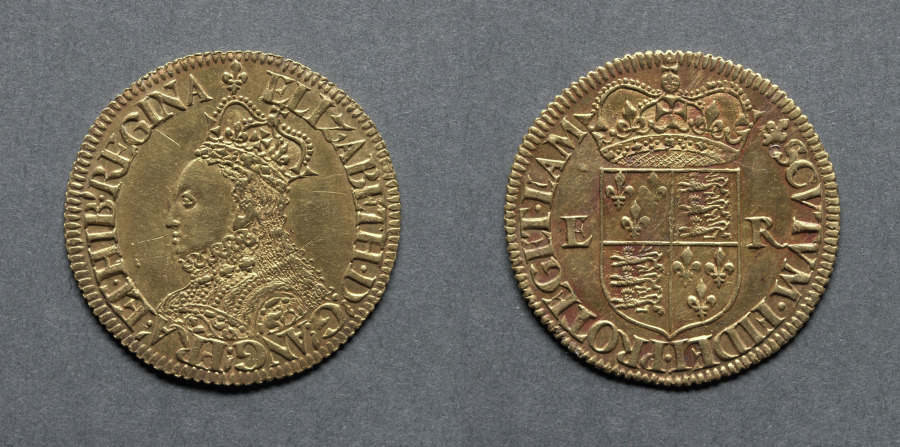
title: Half Pound: Elizabeth I (obverse); Crowned Shield of Arms (reverse)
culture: England, Elizabeth I, 1558-1603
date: 1558–1560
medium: gold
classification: Coins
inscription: ELIZABETH • D : G : ANG : FRA : ET • HIB : REGINA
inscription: SCVTVM • FIDEI • PROTEGET • EAM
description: This is a fine example of a rare piece, produced by a new process. In about 1560 an attempt was made to introduce coins made with the French screw press. The coins are called mill money, a term derived from the use of water and horse mills used to supply power. The machinery included a rolling press, driven by the mill, a cutting punch, and a screw press for stamping the design on the coin. While the screw press coins are far superior to hammered coins in the point of accuracy of shape and weight, the workmen at the mint put up every possible objection because they were afraid their livelihood was in danger. Eloye Mestrell, who brought the press over from France, was a scoundrel who had once worked for the Paris mint. He was an easy prey to hostility and finally ended up on the gallows, having been convicted of counterfeiting. No more is heard of the screw press until the reign of Charles I when a greater Frenchman, Nicholas Briot, was given employment in the government mint. The workmanship on these milled coins of Mestrell was excellent and the coins are beautifully detailed.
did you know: The technology of the French screw press allows greater detail to be viewed, such as the queen's bejeweled dress and long locks flowing out of her crown and down her back.